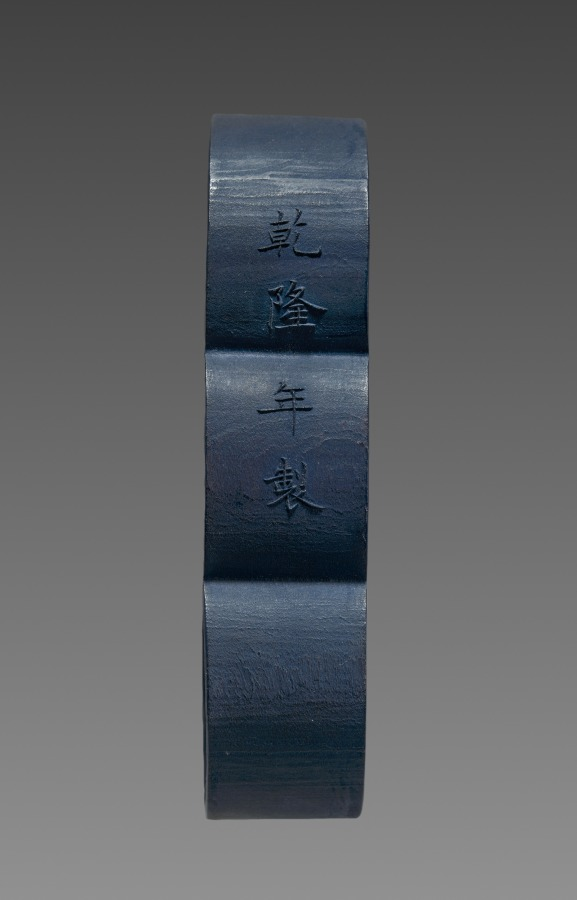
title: Ink Stick from an Imperially Commissioned Set of Ink Stick with Images and Poems of Famous West Lake Sites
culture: China, Qing dynasty (1644–1911), Qianlong reign (1736–95)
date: 1780–94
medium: Molded ink in blue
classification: Miscellaneous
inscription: 乾隆年製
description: This is one of ten ink cakes of different shapes and colors stored in an exquisite lacquer box. Each is inscribed in gold with a poem by the Qianlong emperor, praising the ten famous sights of the Westlake in Hangzhou, near Shanghai. The Westlake is famous for its natural beauty; it was a favorite imperial destination and remains a tourist attraction today. Ink cakes (also called ink sticks) are dissolved with the addition of water and ground on the surface of a flat stone into liquid ink for painting and calligraphy. The precious ink cakes here, however, have never been used.